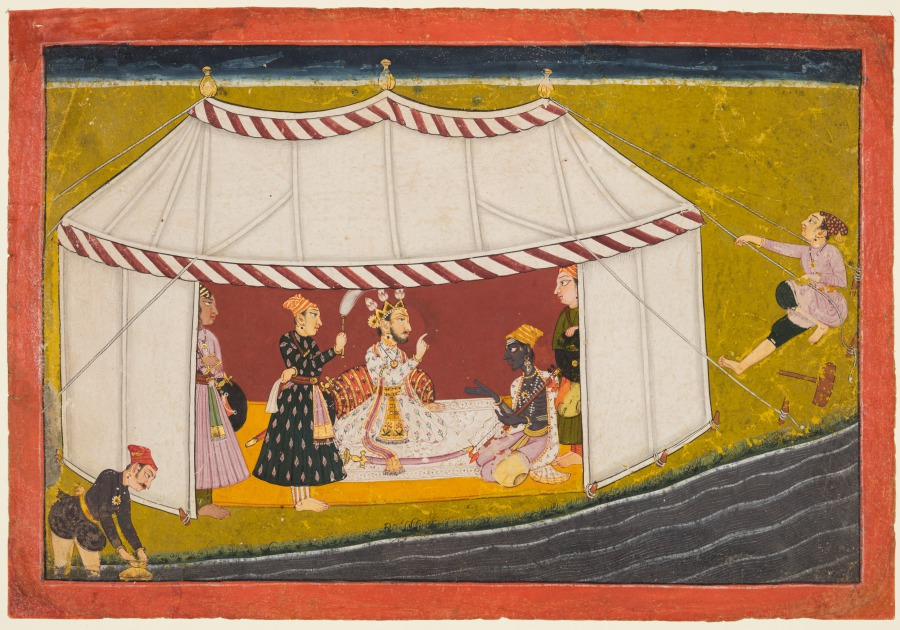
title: King Vikrama summons Madhava, folio 15 from a Madhavanala-Kamakandala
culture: Northern India, Pahari kingdoms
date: c. 1720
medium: gum tempera and gold on paper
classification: Painting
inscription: Roman numeral: VIII K. Iswari Singh of Sirmoor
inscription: caupai. calio kataka kāmavatī desā. dharati dhase bhāra sahe na sesā. jā dīna gayī to peyano kāī. dāsa kayi digapatī baraharaī. tarī kī khurī so kheī udāī. dharatī suraga eka ho jāī. jīha rājā ki sima jaī. le gaja danda milāī so āī. mādhavanala āge kar līā. jīhī eha prema pasarā kiyā. dohā. rājā bīkramaseṃna valī uhane sāna bajāe. kāmavatī ke nīkata īha nadī taṭa utari jvāe.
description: Having arrived at the border of his enemy’s kingdom, Madhava’s ally, King Vikrama, encamps by the riverbank. A crown and subtle halo behind his face testify to his righteousness. Separated from his beloved, Madhava has become so miserable that he has been unable to eat. Clutching his vina (stringed instrument), he converses with the king about how to accomplish his reunion with Kamakandala. The king promises to bring them back together.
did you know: Madhava is depicted in an emaciated form unlike his other representations in the manuscript.